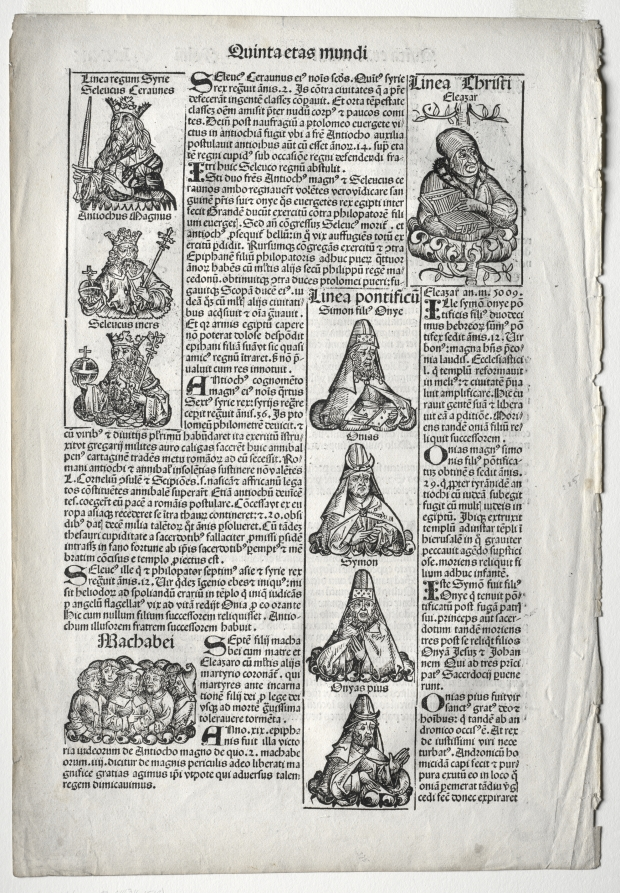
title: Genealogical Page; published in the Nuremberg Chronicle by Hartmann Schedel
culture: Germany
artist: Michael Wolgemut (German, 1434–1519)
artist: and Wilhelm Playdenwurff (German, 1494)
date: 1493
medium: woodcut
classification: Print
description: After Johann Gutenberg's Bible (1453-56), the Nuremberg Chronicle is the most famous 15th-century publication and an early bestseller, documenting history from the creation of the world to the voyages of discovery in the 1490s. The book's large scale (18.11 x 12.59 x 3.5 inches), unprecedented number of illustrations (1,809 woodcuts printed from 645 woodblocks), and great length (over 600 pages) made it the most ambitious printed publication since the invention of movable type just a few decades earlier. Wolgemut and Pleydenwurff illustrated the text and provided complete manuscript layouts, an unusual procedure at the time but nonetheless successful in closely integrating the images and text, producing an extraordinarily cohesive unit.